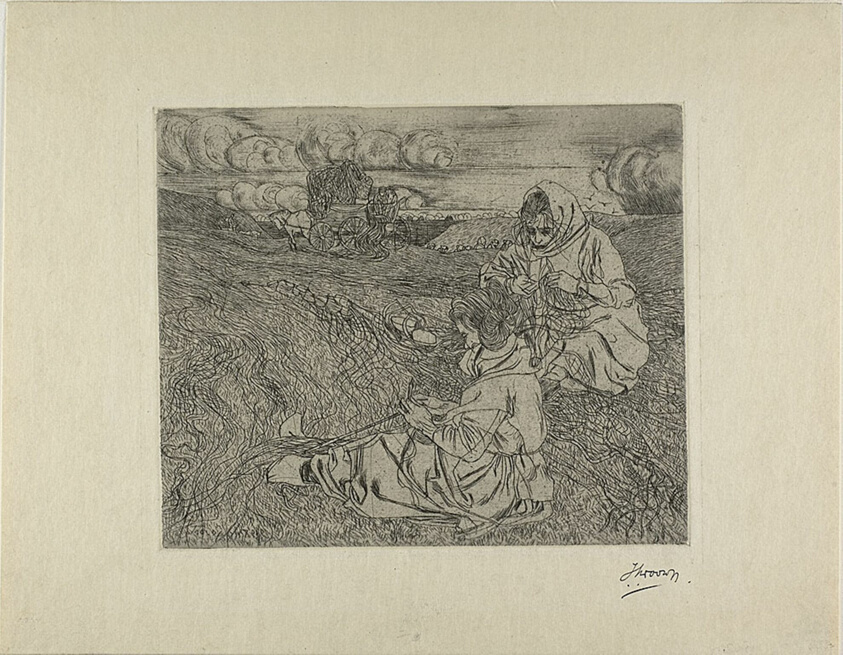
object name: Print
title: The Net Menders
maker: Jan Toorop (Dutch, 1858-1928)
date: 1899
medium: Drypoint on cream vellum paper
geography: Netherlands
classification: drypoint; prints and drawing; print